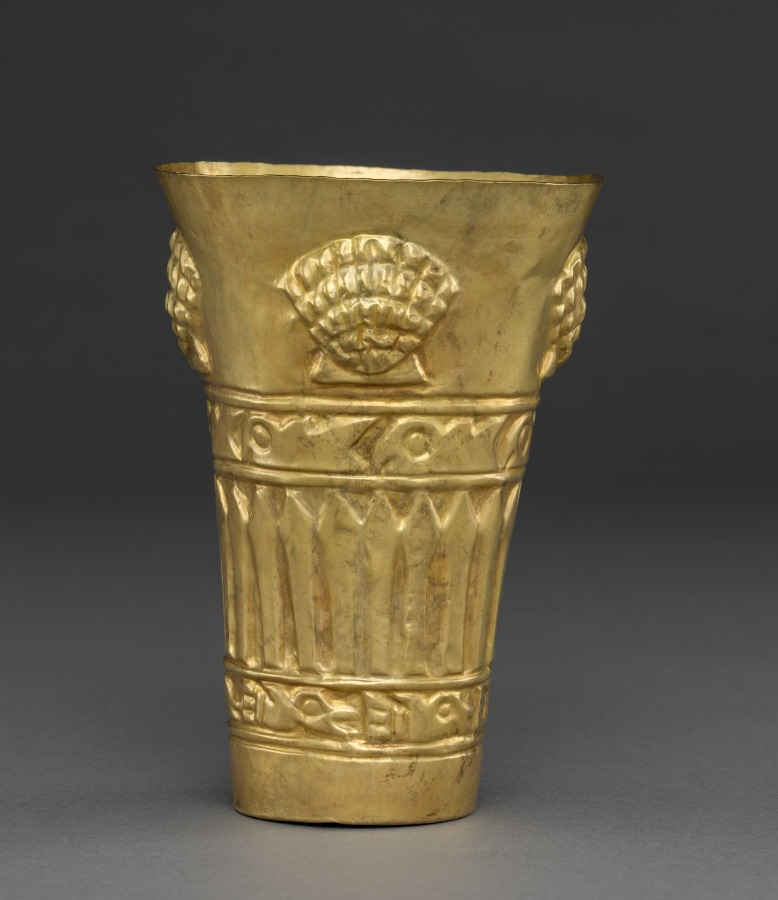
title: Beaker with Shells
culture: Central Andes (Peru), Lambayeque (Sicán) people, 10th century-12th century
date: 900–1100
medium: gold, hammered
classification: Metalwork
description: This beaker was created by an artist of the Lambayeque culture of Peru's north coast. Shells appear in the upper register representing spondylus, the red-orange thorny oyster greatly valued by pre-Hispanic Andean societies. If such beakers were used in life—that is, not created exclusively for the lavish tombs in which they have been found in quantities—they may have figured in feasting events that were central to late pre-Hispanic political, social, and religious life.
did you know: Highly valued as a luxury material, spondylus shells served as symbols of power and prestige.